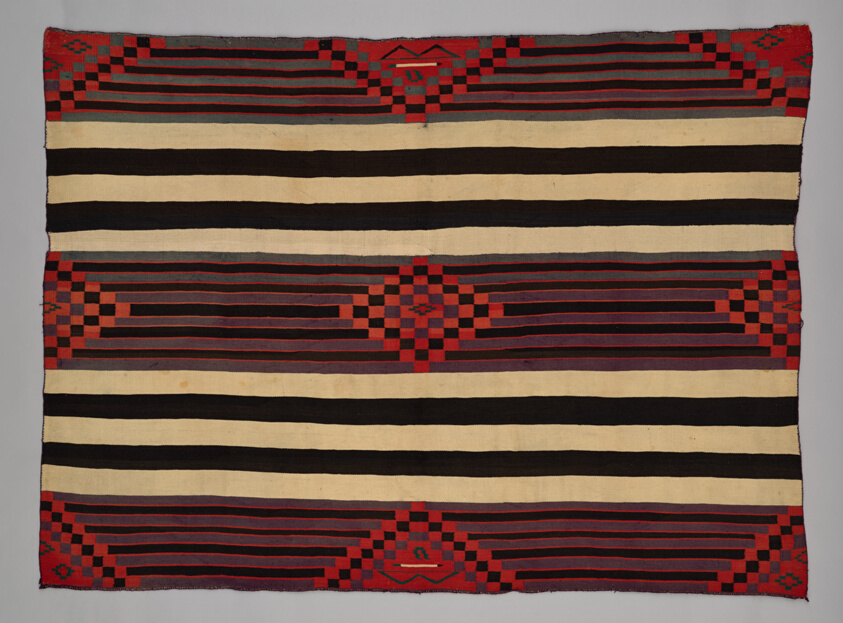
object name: Textile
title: Chief Blanket (Third Phase)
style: navajo, dine, Arts of the Americas, indigenous, north american, native american, native north american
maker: Navajo (Diné) (Arizona, New Mexico, and Utah, United States)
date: c. 1880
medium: Wool, plain weave with "lazy lines" and dovetail tapestry weave; warp and weft twining; corner tasseles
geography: New Mexico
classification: blanket (covering); wool; art of the americas; textile